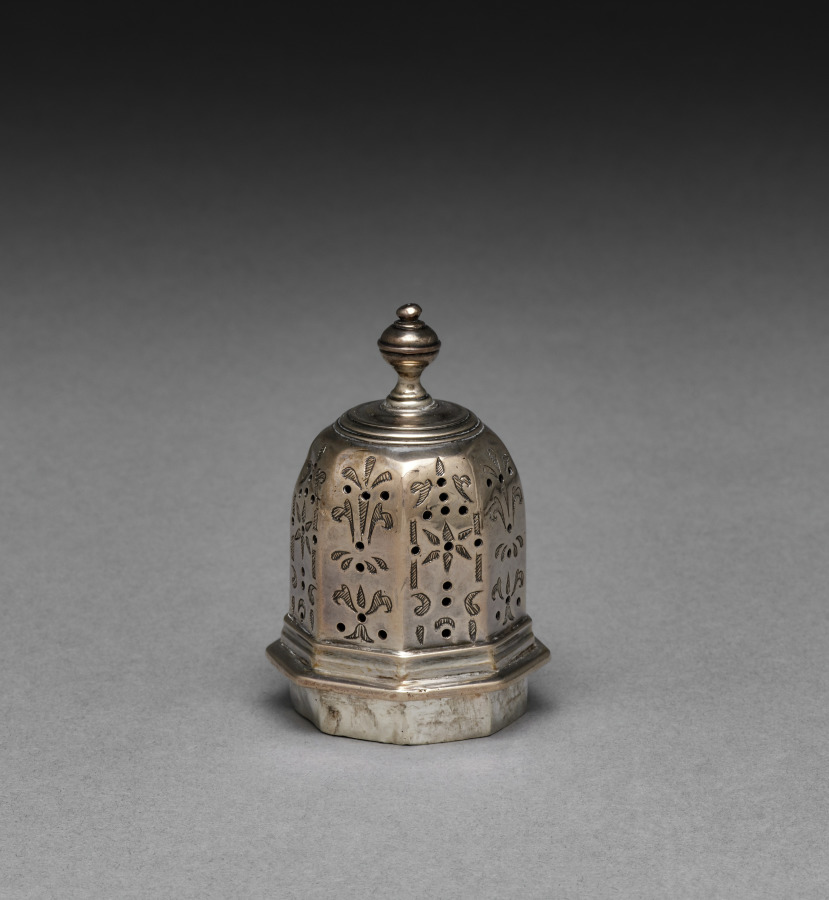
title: Caster (lid)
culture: England, London, 18th century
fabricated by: William Spackman (British)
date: 1719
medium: silver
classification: Silver